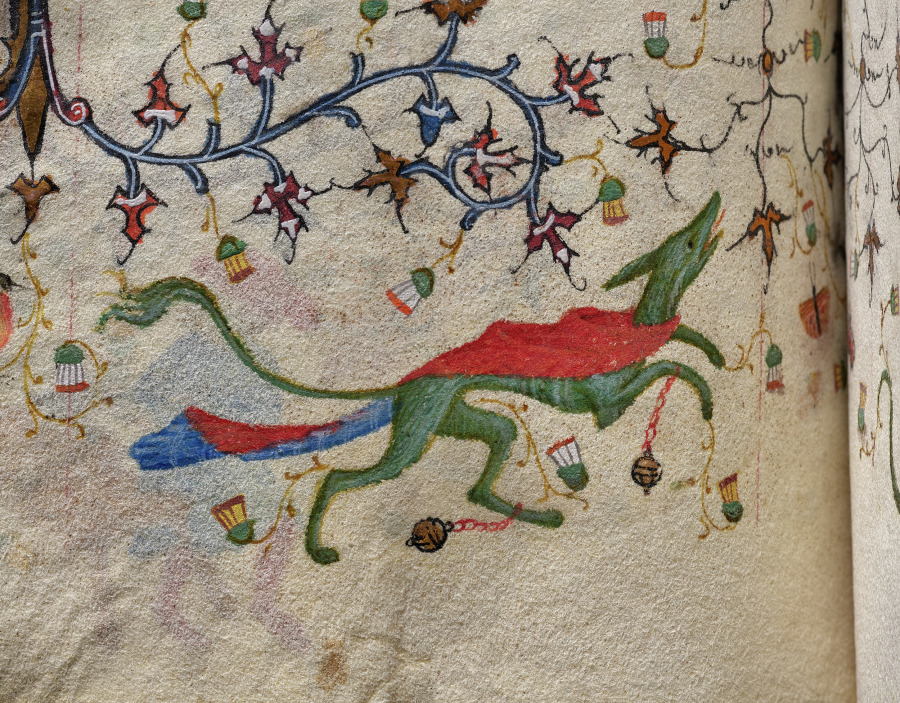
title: Hours of Charles the Noble, King of Navarre (1361-1425): fol. 92v, Text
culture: France, Paris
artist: Master of the Brussels Initials and Associates (French)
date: c. 1405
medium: ink, tempera, and gold on vellum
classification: Bound Volume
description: This precious volume was obviously highly prized by its owner, the French-born King of Navarre, who had his coat of arms painted on no less than twenty folios. Rather than directly commissioning this manuscript from a specific workshop, it seems that Charles the Noble acquired his book of hours -- perhaps ready-made for the luxury market -- while on a trip to Paris in 1404-05. A collaborative effort, six painting styles are evidenced within the pages of this codex, those of two Italians, two Frenchmen, and two Netherlanders. The painter who was responsible for the planning and decoration of the book, and who produced seventeen of the large miniatures, was a Bolognese artist known as the Master of the Brussels Initials. His principal assistant, responsible for most of the borders, was a Florentine who signed his name "Zecho" da Firenze on folio 208 verso.